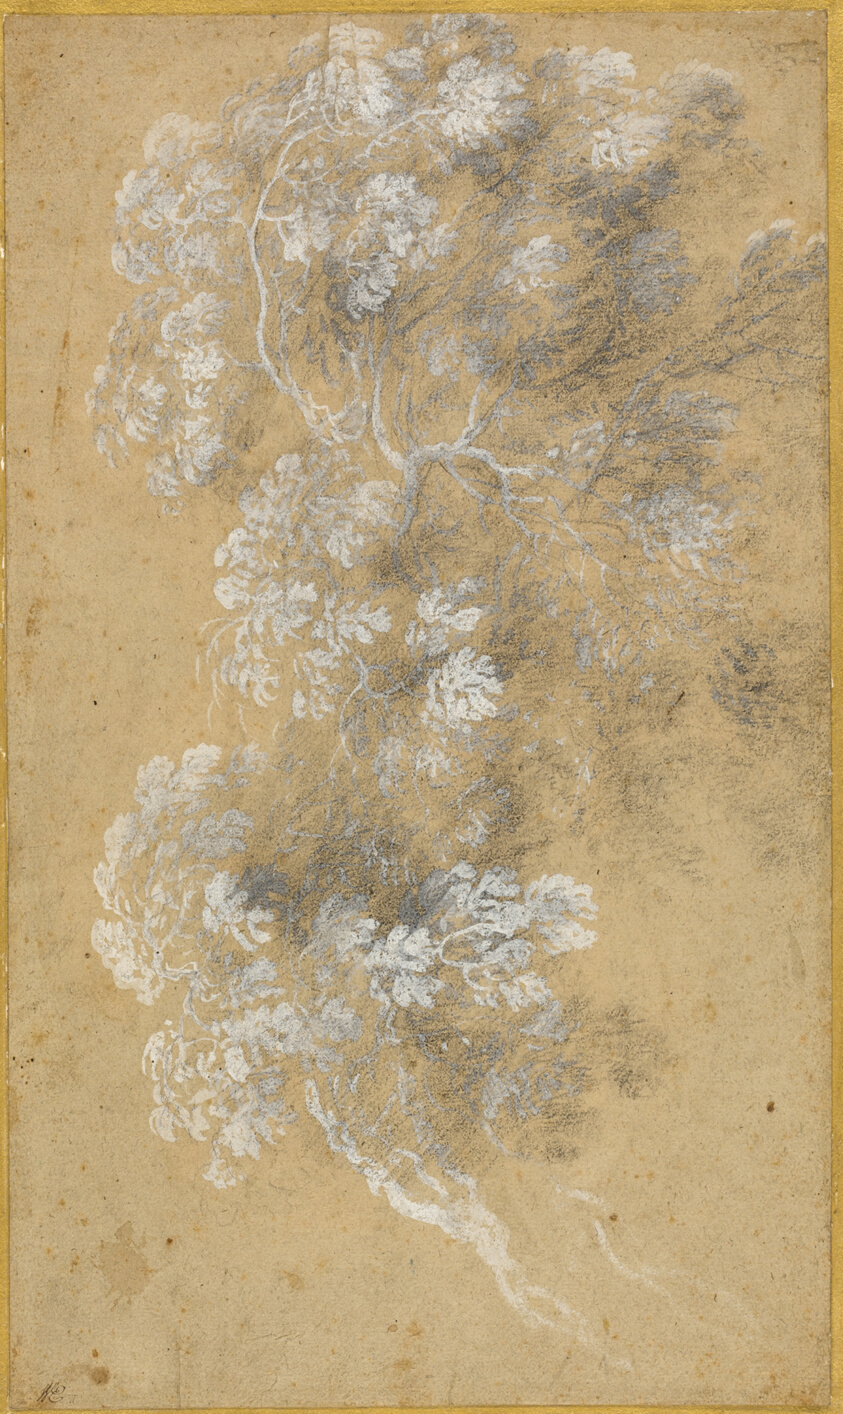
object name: Drawing and Watercolor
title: Sketch of Foliage and Branches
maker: Angeluccio; Italian, 1620/25-1645/50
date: c. 1645–50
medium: Black chalk, white and gray gouache, on tan laid paper, laid down on perimeter to cream wove card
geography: France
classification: gouache; drawings (visual works); prints and drawing